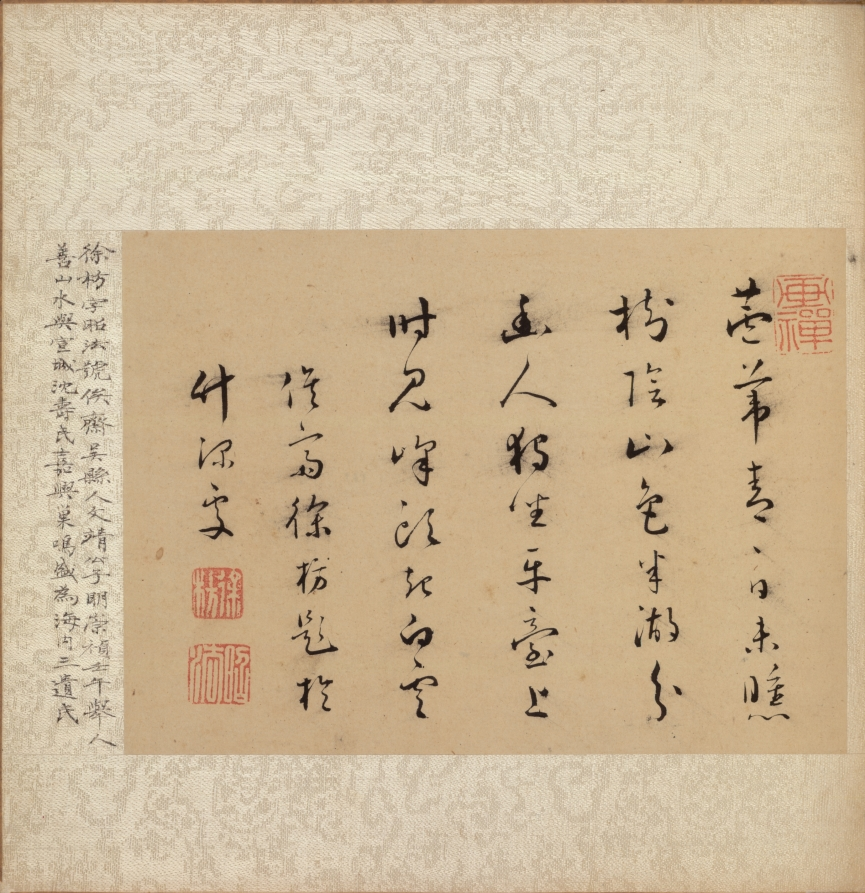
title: Album of Miscellaneous Subjects, Leaf 3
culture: China, Qing dynasty (1644-1911)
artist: Fan Qi (Chinese, 1616–after 1694)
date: early 1650s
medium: album leaf, ink and color on silk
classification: Painting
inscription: Artist seal: Fan Qi 樊圻. Poem by Xu Fang 徐枋 (1622–1694): Green are the reeds, the sun not yet set;/ Tree foliage and mountain colors divide the lake in two halves./ A solitary recluse sits upon a flat bluff,/ Occasionally observing white clouds rising from the mountain tops.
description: Fan Qi's painting for the third leaf of the album evokes Wang Wei's poetic line: Sit and watch the clouds rising. Xu Fang's calligraphic colophon reads: Green are the reeds, the sun not yet set; Tree foliage and mountain colors divide the lake into two halves. A solitary recluse sits upon a flat bluff, Occasionally observing white clouds rising from the mountain tops.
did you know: A waterfall descends between two mountains; the series of cascades is hinted by the careful placement of intermittent rocks.